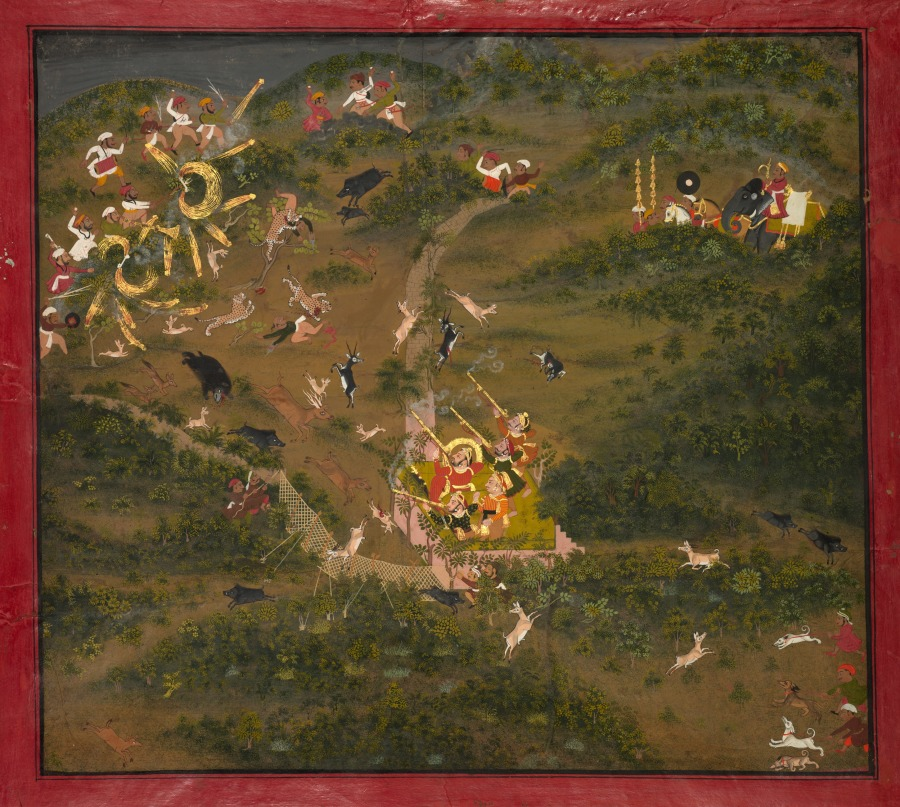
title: Maharana Jagat Singh II Hunting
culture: Northwestern India, Rajasthan, Rajput kingdom of Mewar, Udaipur, Court of Jagat Singh (reigned 1734-51)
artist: Jugarsi, son of Jiva (Indian, active mid-1700s)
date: 1747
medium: Gum tempera and gold on paper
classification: Painting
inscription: Jugarsi, son of Jiva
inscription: [?]44 115 naṁ kī: 15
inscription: śrī mhārānājī śrī jagat sīṁghjī / odī bīrājyā : nāṁr ṭī mareyo māryo / hajur thakur: nām : mhārājā nāthjī 1 / padyār kānjī 1 thakur sīrdār sīṁghjī / bābo bhārath sīghjī 1 samat 1806 rā āsoj bīd 10 rī vaire dīn / nijar huvo cītāro jugarno jīvā ro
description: One of the favorite pastimes of the Rajput nobility was hunting, a subject frequently depicted in secular painting in Rajasthan. Often much larger than other Indian paintings, hunting scenes glorified the pleasures and splendors of these stately affairs. This colorful painting depicts a royal hunt conducted by the Maharana Jagat Singh II of Udaipur. An inscription on the reverse side of the painting mentions the Maharana's name along with the hunting party's other participants, including the Maharana's brother. The hunt takes place in a detailed landscape of hills and varied vegetation. The animals (tiger, bear, wild boar, deer, stag, and antelope) are rounded up and diverted by servants (who shoot firecrackers) toward the shooting box at the center of the composition, where the royal members of the hunting party await their prey. Another group of servants with dogs approaches from the opposite direction to cut off the animals' route of escape. Some beasts are already killed or wounded, while others are trying desperately to run for their lives.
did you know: The painting is signed on the reverse by the artist—a rare occurrence in Indian painting. The name reads "Jugarsi, son of Jiva."